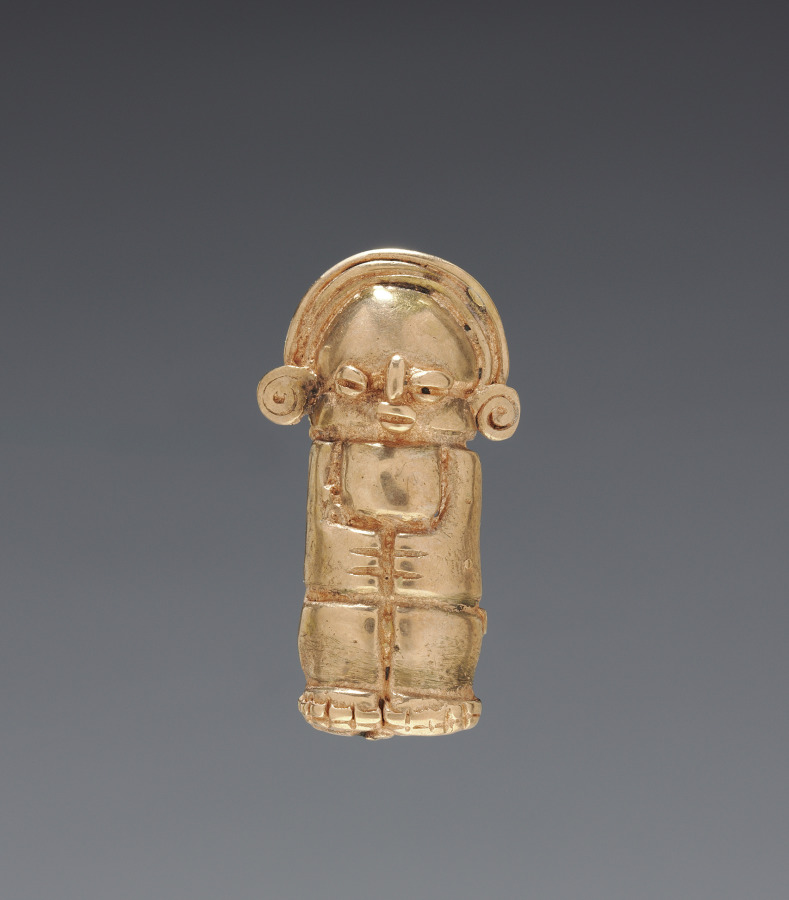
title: Necklace Figurine Bead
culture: Colombia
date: 1–700 CE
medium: cast gold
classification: Jewelry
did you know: Working with gold dates back to at least 500 BC in Ecuador and Colombia.